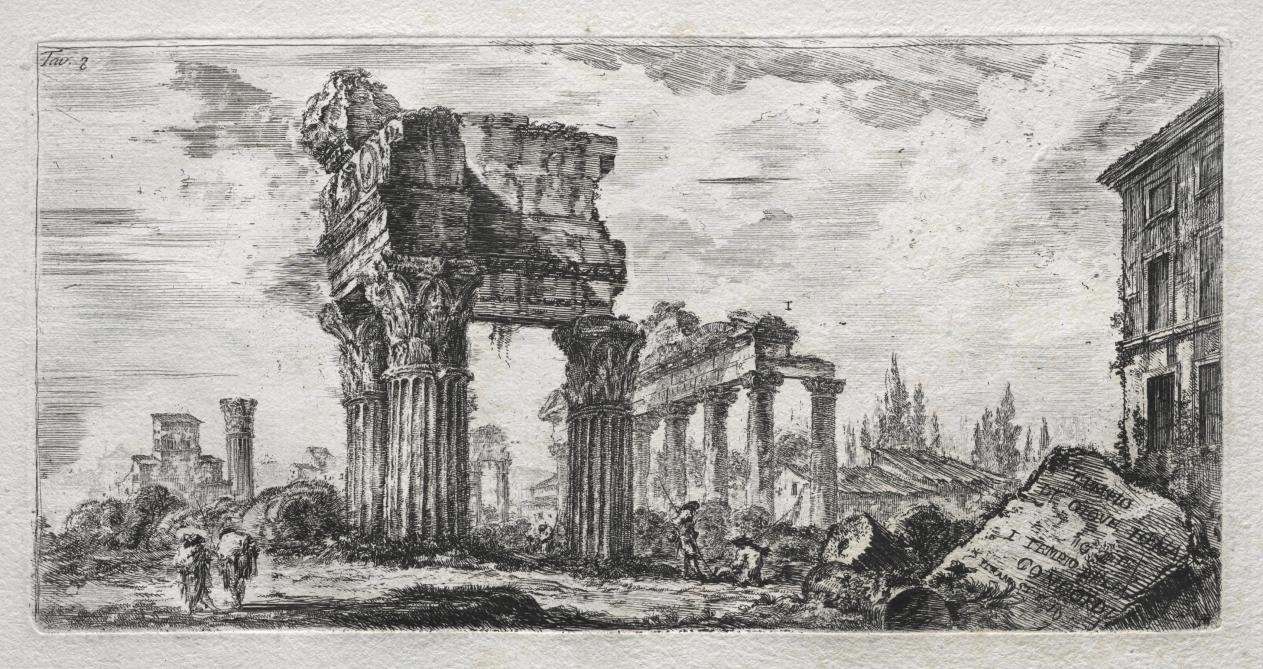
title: Tempio di Giove Tonante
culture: Italy, 18th century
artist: Giovanni Battista Piranesi (Italian, 1720–1778)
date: c. 1748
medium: etching and engraving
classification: Print